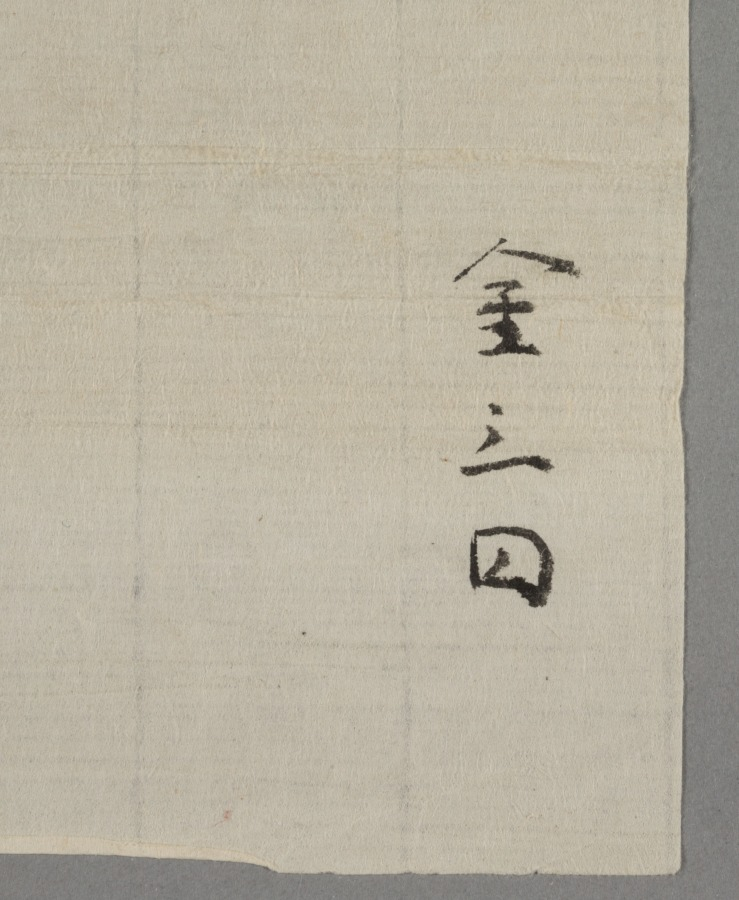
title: Tiger in Wind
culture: Japan, Edo period (1615–1868) to Meiji period (1868–1912)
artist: after Maruyama Ōkyo (Japanese, 1733–1795)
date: 1800s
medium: hanging scroll; ink on paper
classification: Painting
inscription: 「秋空一鶴」賛 長嘯一聲風括地「月渚」朱文方印「祐常之章」白文方印 壬辰初冬寫応挙 「應舉之印」白文方印・「仲選」白文方印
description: The seals appended to the inscription on this painting suggest that the text was brushed by Yūjō (1723–1773), an imperial prince who became a Buddhist monk and was abbot of Enman'in at Miidera. The line is from a poem attributed to a Yuan dynasty poet, Yu Ruyu (dates unknown), and describes the sound of a fierce wind lashing the ground. Wind is associated with the roar of the tiger. Yūjō was Maruyama Ōkyo's most important patron as a young artist, and this painting has a signature asserting that Ōkyo created it in 1772, the year before Yūjō's death. While Yūjō produced a preface for a now famous set of handscrolls he commissioned Ōkyo to paint, and a number of Ōkyo's compositions for Enman'in survive, this work would appear to be one imagining their relationship, as opposed to a genuine piece.